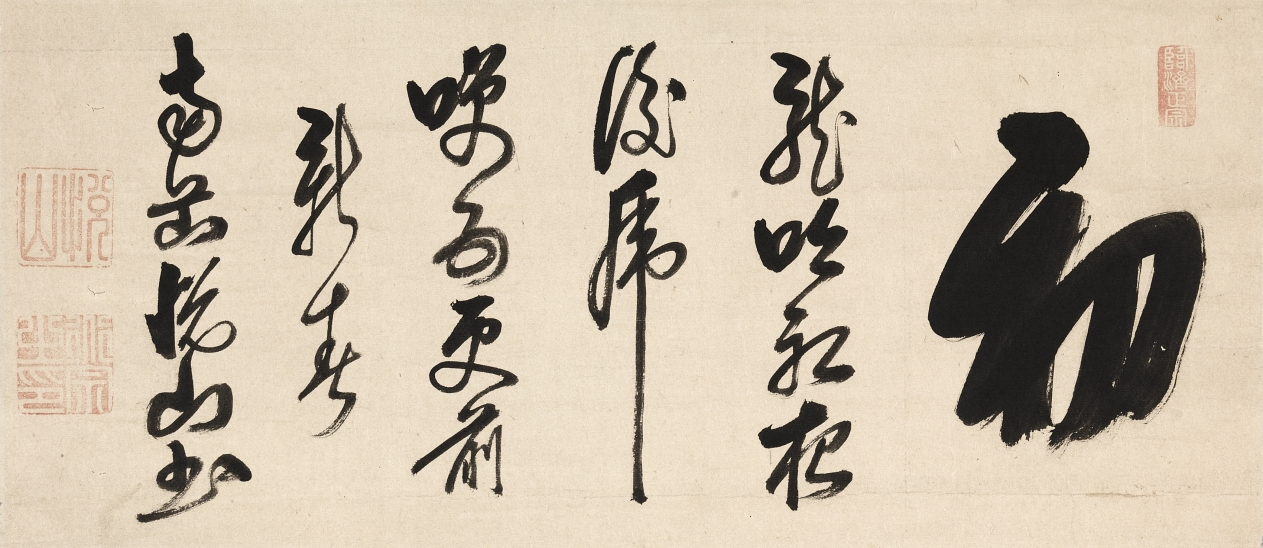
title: Calligraphy in Semi-Cursive Style (xing-caoshu)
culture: China, Qing dynasty (1644–1911)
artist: Yueshan Daozong (Chinese, 1629–1709)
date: c. 1660–1709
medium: Hanging scroll; ink on paper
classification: Calligraphy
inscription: 初/ 龍吟初夜後，虎嘯五更前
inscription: 悅山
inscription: 道宗之印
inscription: Linji zheng zong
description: This spontaneous, bold calligraphy style is characteristic of members of the Japanese Ōbaku school (Huangbo in Chinese) of Chan (Zen in Japanese) Buddhism, which was founded in Japan by Chinese monks in the 1600s. The monk Yueshan emigrated to Japan from the Chinese province of Fujian, taking a priestly post at Manpukuji, the headquarters of the Ōbaku school in Japan. He later became the seventh abbot of the distinguished temple. Yueshan’s calligraphy features rounded characters that allow him to fuse strokes and characters in speedy brush movements. Here the text begins with the large character chu (初, “the beginning”), the initial focus of meditation on the text: The dragon murmurs after sunset. The tiger roars before dawn.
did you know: Ōbaku-style calligraphy favors rounded—rather than angular—brushstrokes. It is not a subtle style of calligraphy, as the Chan monks preferred a bold approach.